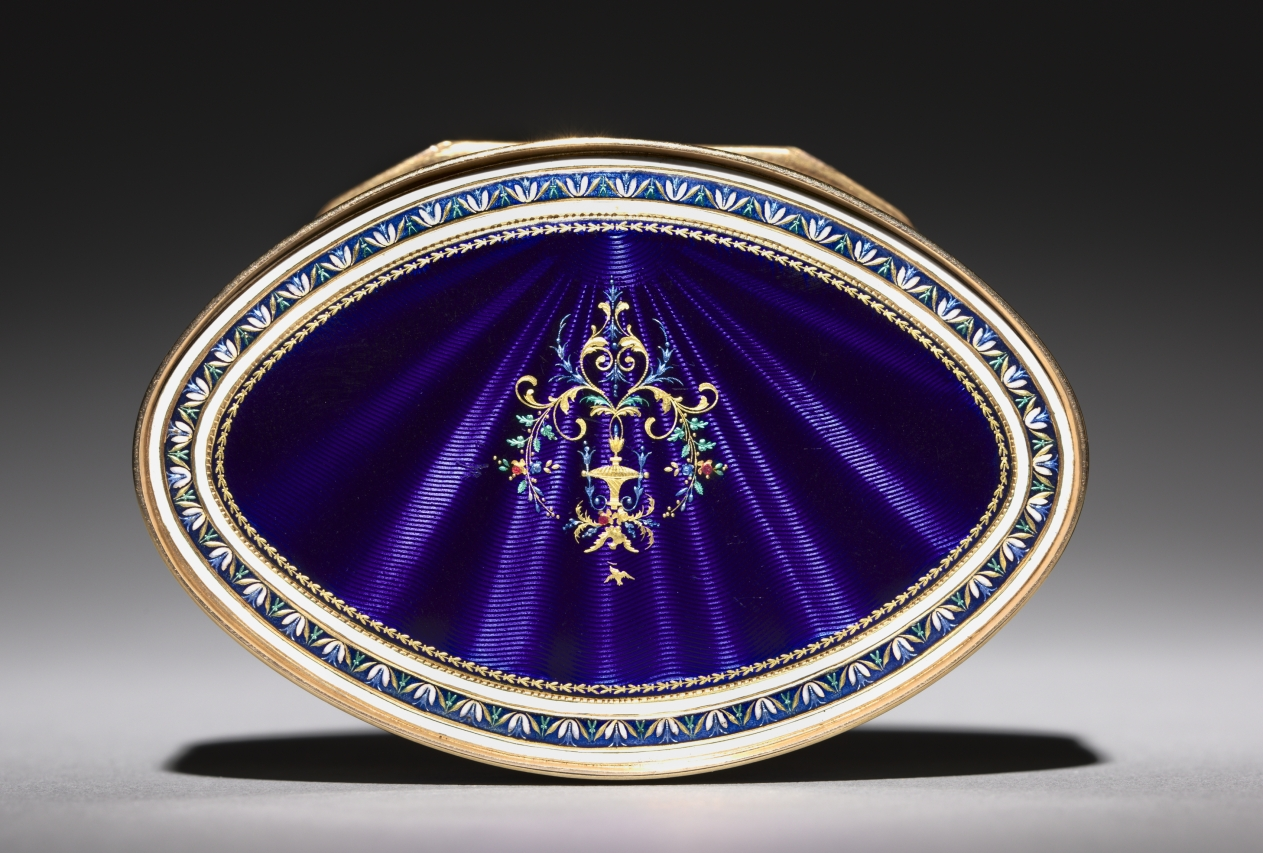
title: Box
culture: Switzerland, Geneva, late 18th Century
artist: Georges Rémond et Cie (Swiss)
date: late 1700s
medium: gold and enamel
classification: Enamel